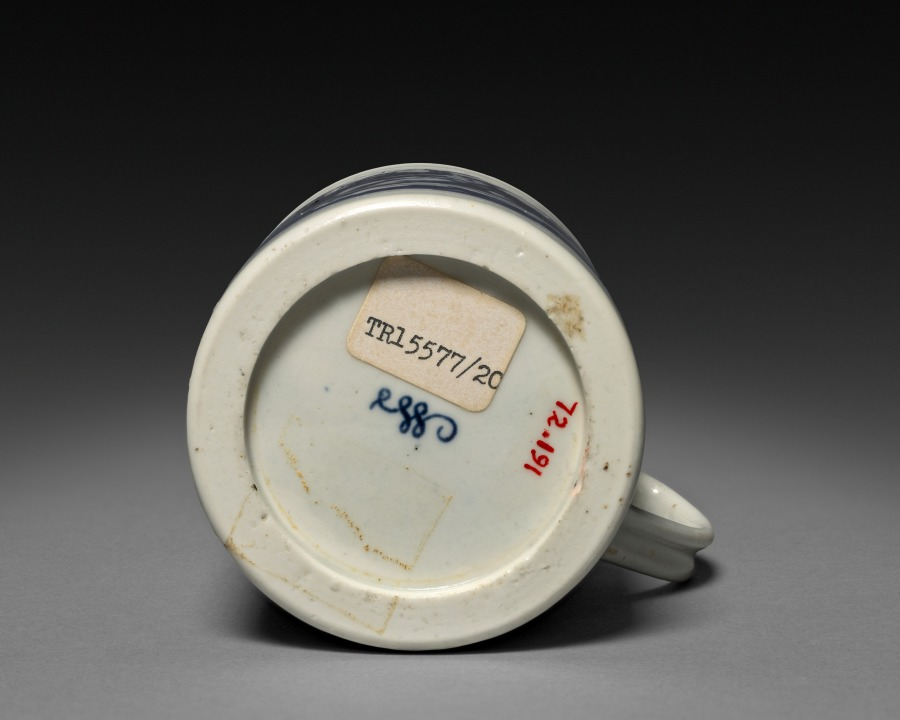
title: Chinoiserie Mug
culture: England, Worcester, 18th century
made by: Worcester Porcelain Factory (British, established 1751)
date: c. 1760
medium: soft-paste porcelain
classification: Ceramic